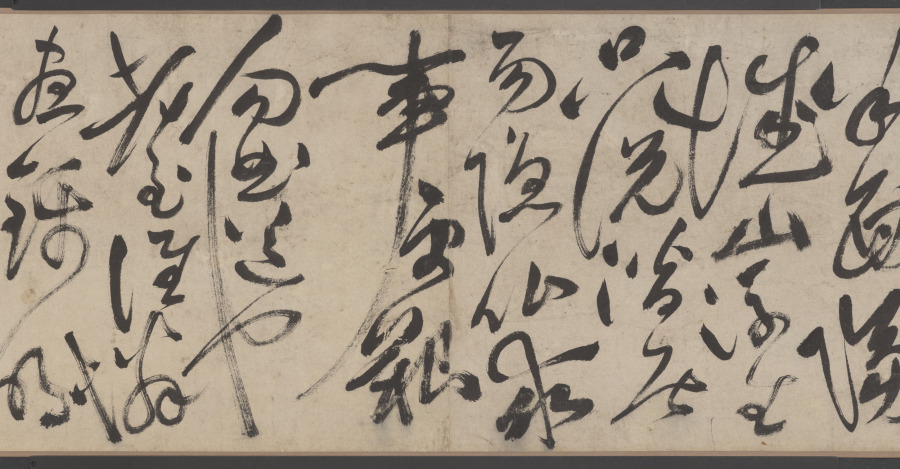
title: Retreat on an Autumn Day, in Cursive Script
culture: China, Ming dynasty (1368–1644)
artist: Zhu Yunming (Chinese, 1460–1527)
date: dated 1523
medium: Handscroll; ink on paper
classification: Calligraphy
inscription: 款識：讌於從一堂，爛漫醉書。癸未（1523）七月晦日也。枝山允明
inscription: 《閒居秋日》逃暑應能蹔閉關，未消多把古賢攀。並拋杯酌方為懶，少事篇章恐礙閑。風墮一庭鄰寺葉，雲開半面隔城山。浮生只說潛居易，隱比求（脫「名」）事更艱。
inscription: 《句曲道中》老至誰憐晝錦明，春來聊得客襟清。宵依星斗宮壇臥，曉（脫「入」）神仙宅舍行。眼看山多城郭少，肩挑詩重簿書輕。何時總入煙霞去。不見人間寵辱驚。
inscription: 《登茆峰》下馬門前一振衣，翠微高迥逼清微。雲端洞裡仙人過，月下山中長史歸。金焰暈牀砂氣伏，紫雲穿竇朮芽肥。神方能詠不能遇，一夜爽靈峰外飛。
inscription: 鈐印：「晞哲」、「允明」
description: This masterwork of calligraphy by Zhu Yunming from Suzhou combines two poems by the artist in cursive script style, characterized by its uninhibited, swift, and intuitive brushwork, so powerful that it here dissolved characters into dots or lines. Written from right to left and top to bottom and alternating in light dry to deep saturated ink, single characters may take a whole column or extend into the next one. Following the movement of the brush, they seem to dance over the paper.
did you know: Zhu Yunming stated that he was in an inebriated state when he created this work.